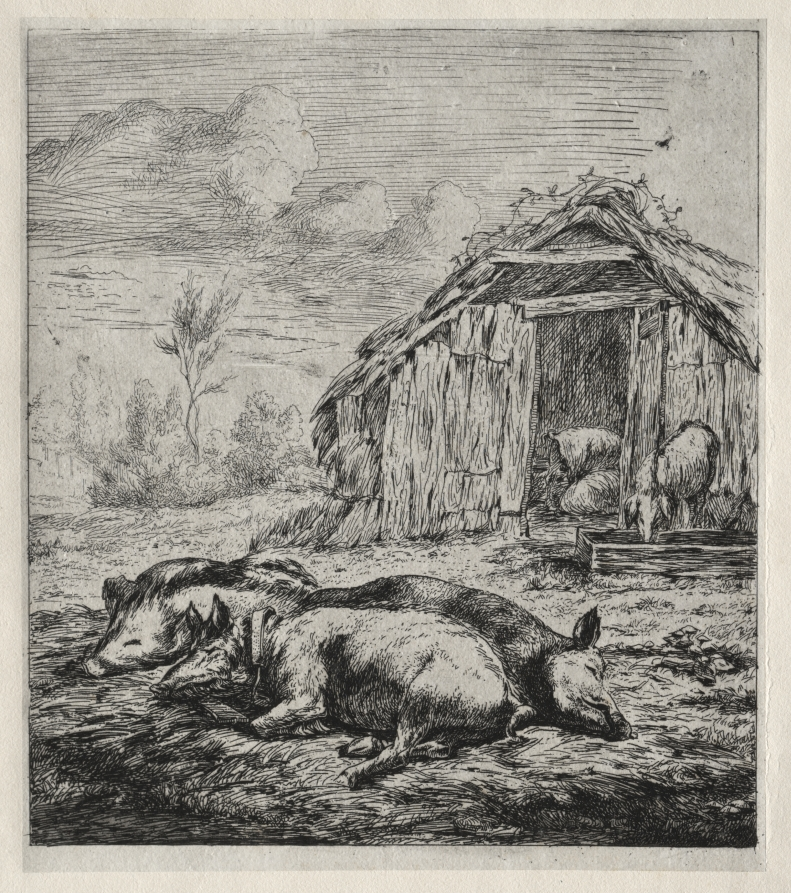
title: Three Swine Lying in Front of a Sty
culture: France, 19th century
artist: Charles Meryon (French, 1821–1868)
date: 1850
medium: etching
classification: Print